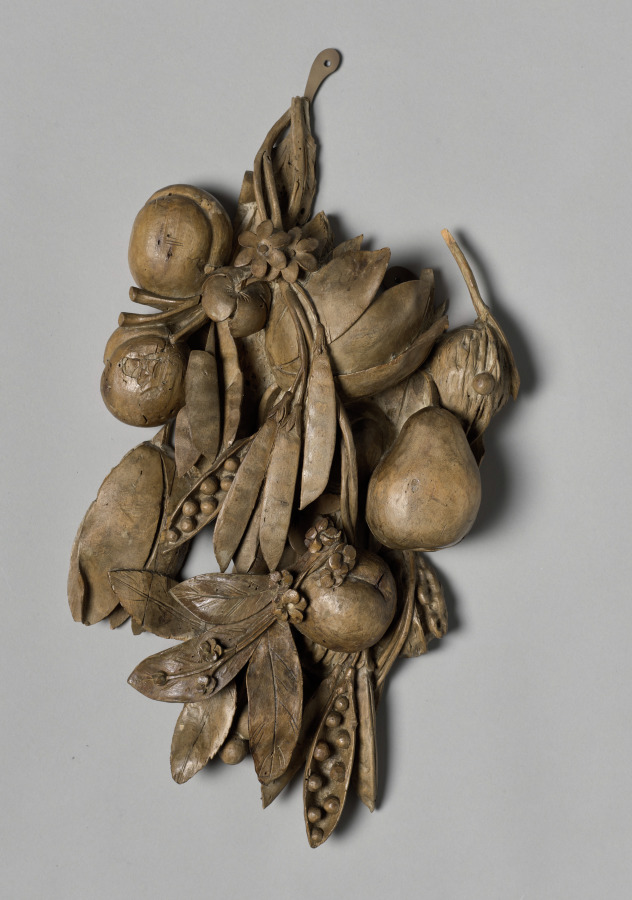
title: Carving from an Overmantel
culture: England, 17th century (Charles II)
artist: Grinling Gibbons (British, 1648–1721)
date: c. 1675–77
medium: lindenwood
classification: Sculpture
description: The arrangement of architectural elements within grand interior spaces in the late 1600s and early 1700s emphasized symmetry and height. Decorative elements such as elaborately carved mantels, mirrors, paintings, and applied wall decorations were often stacked to achieve a visual focal point at one or both ends of the room. This particular overmantel decoration once hung above the fireplace in the Green Drawing Room of the Earl of Essex at Cassiobury in Watford, near London. In 1823, the British painter William Henry Hunt (1790–1864) produced a watercolor of the drawing room which featured this overmantel decoration. Grinling Gibbons was born in Rotterdam, the Netherlands, of English parents. After training there as an artist, he came to England in the 1660s and soon began to work as a sculptor of interior ornament, particularly in wood. One of his first large-scale decorative projects was the series of interiors at Cassiobury House.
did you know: The swags of fruit and foliage featured in this wooden overmantel decoration evoke the bounty of the English countryside.